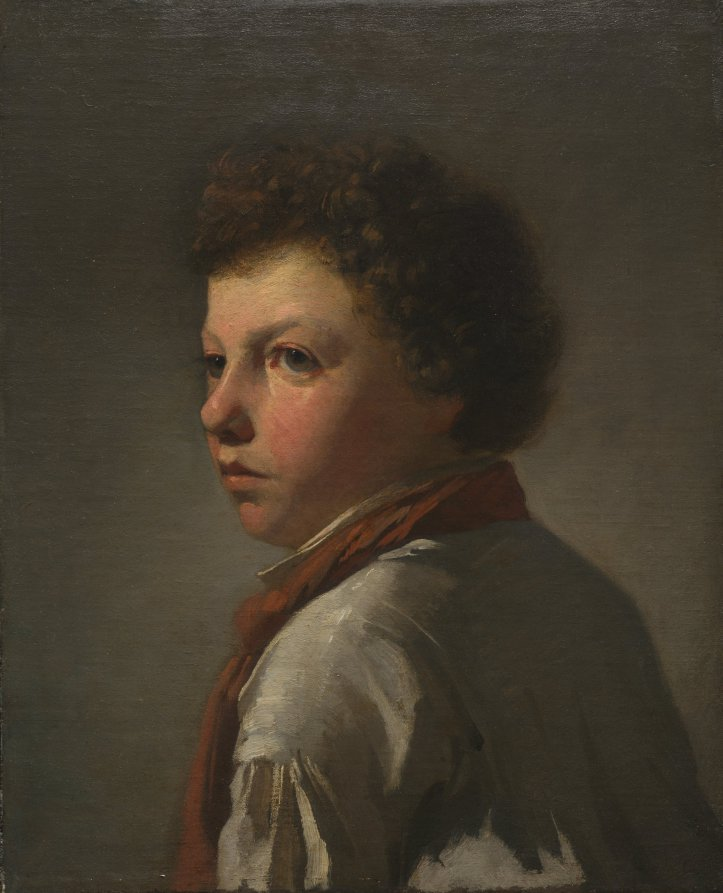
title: Portrait of a Young Man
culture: France, 19th century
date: not dated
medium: oil on fabric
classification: Painting